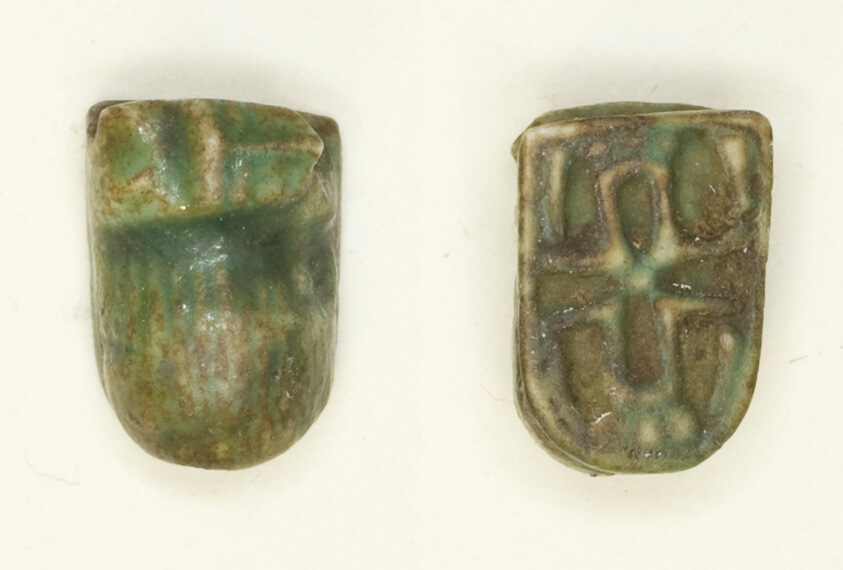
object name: Costume and Accessories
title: Scaraboid: Cat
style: new kingdom, egyptian, ancient, eighteenth dynasty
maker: Egyptian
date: New Kingdom, Dynasty 18 (about 1550–1295 BCE)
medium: Glazed steatite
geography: Egypt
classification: scaraboids; amulet; ancient art; costume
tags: cats, cobras